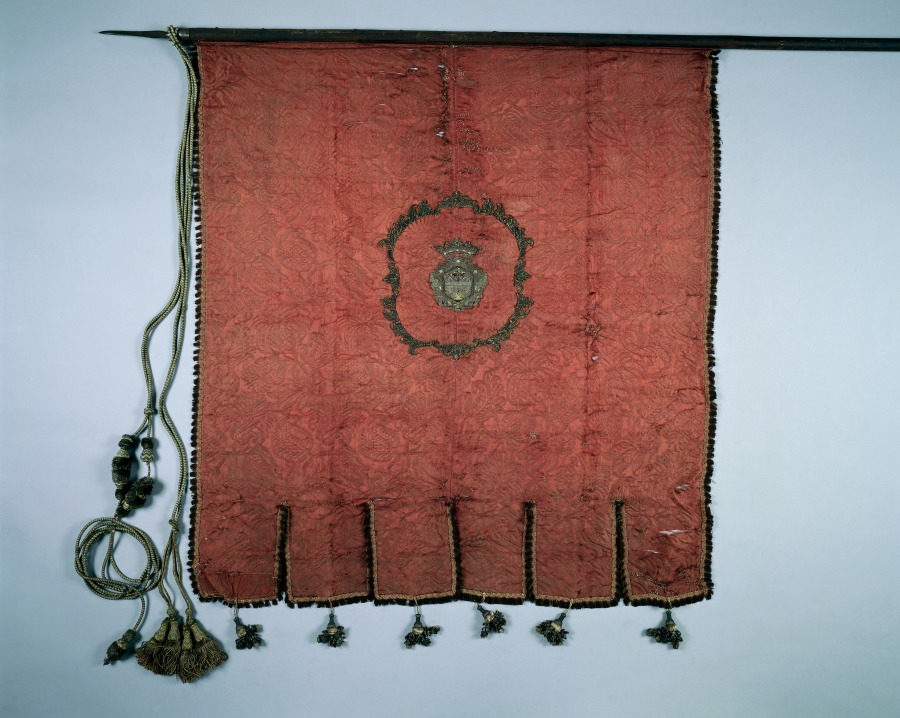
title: Banner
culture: Spain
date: 1700s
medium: crimson silk brocade, with applied embroidery; scalloped border with fringe and tassels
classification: Textile